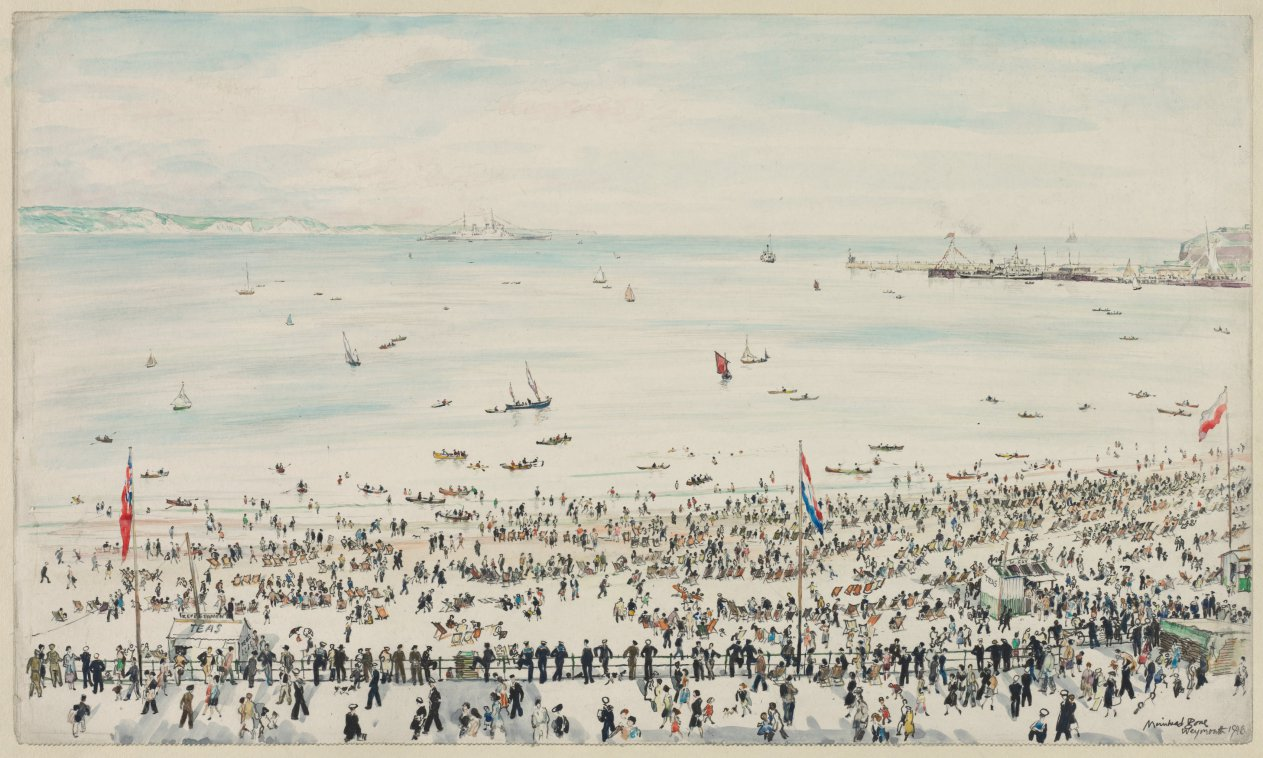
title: Weymouth Bay, Victory Day Celebrations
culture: England, 20th century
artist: Muirhead Bone (British, 1876–1953)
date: 1946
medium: watercolor, graphite, pen and ink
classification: Drawing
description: Hundreds of British beachgoers in Weymouth Bay celebrate the first anniversary of Victory Day, marking the Allies' victory against Germany in May 1945. This colorful depiction highlights the electrified mood of the population. Sir Muirhead Bone served as the official war artist during World War II. Having been appointed in 1916, Bone captured this happy moment after having lived through two world wars.